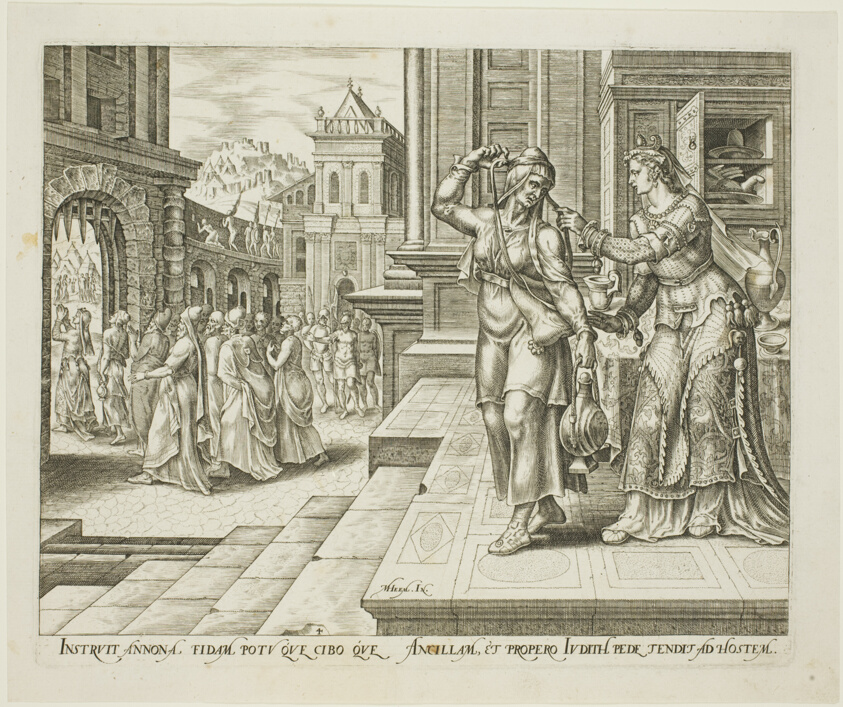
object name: Print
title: Judith Preparing Herself to Leave for the Enemies' Camp, plate four from The Story of Judith and Holofernes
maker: Philip Galle (Netherlandish, 1537-1612); after Maarten van Heemskerck (Dutch, 1498-1574)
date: 1564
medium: Engraving in black on ivory laid paper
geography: Netherlands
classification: engraving; paper; print; prints and drawing